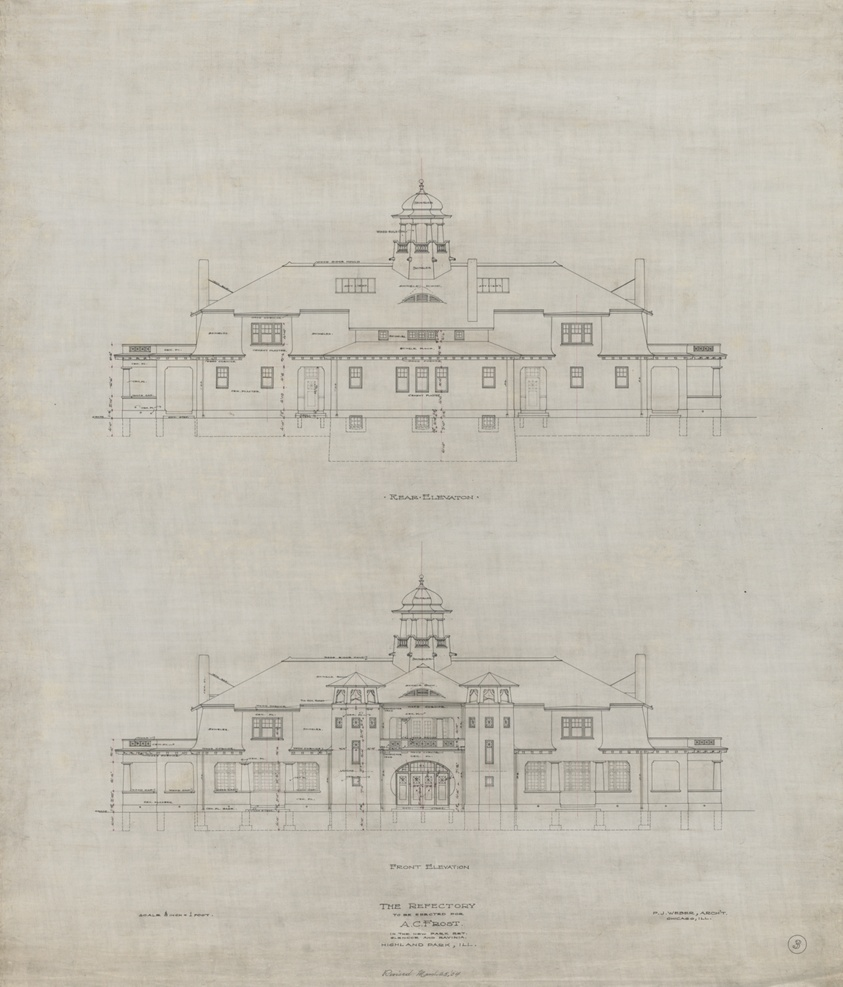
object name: Architectural Drawing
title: Ravinia Refectory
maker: Peter J. Weber; Amercian, born Germany, 1863-1923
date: 1904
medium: Ink on linen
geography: Ravinia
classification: ink; architectural drawing